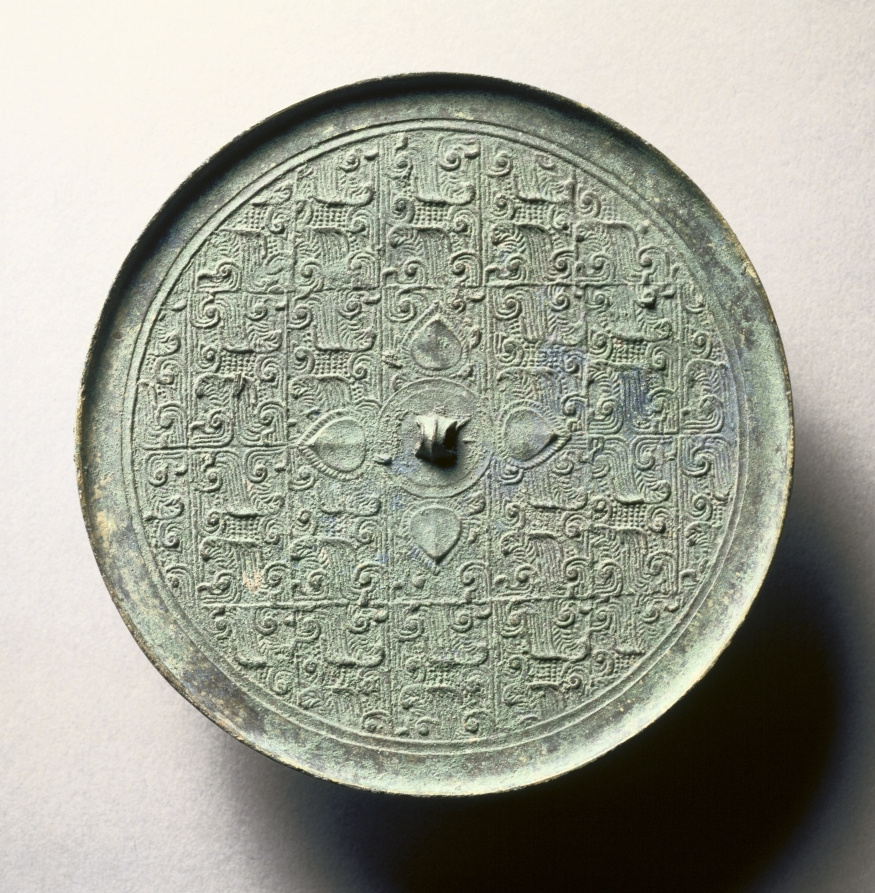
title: Mirror with Quatrefoil and Feather Pattern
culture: China, Eastern Zhou dynasty (770–256 BCE), Warring States period (475–221 BCE)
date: 300s BCE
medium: bronze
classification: Metalwork